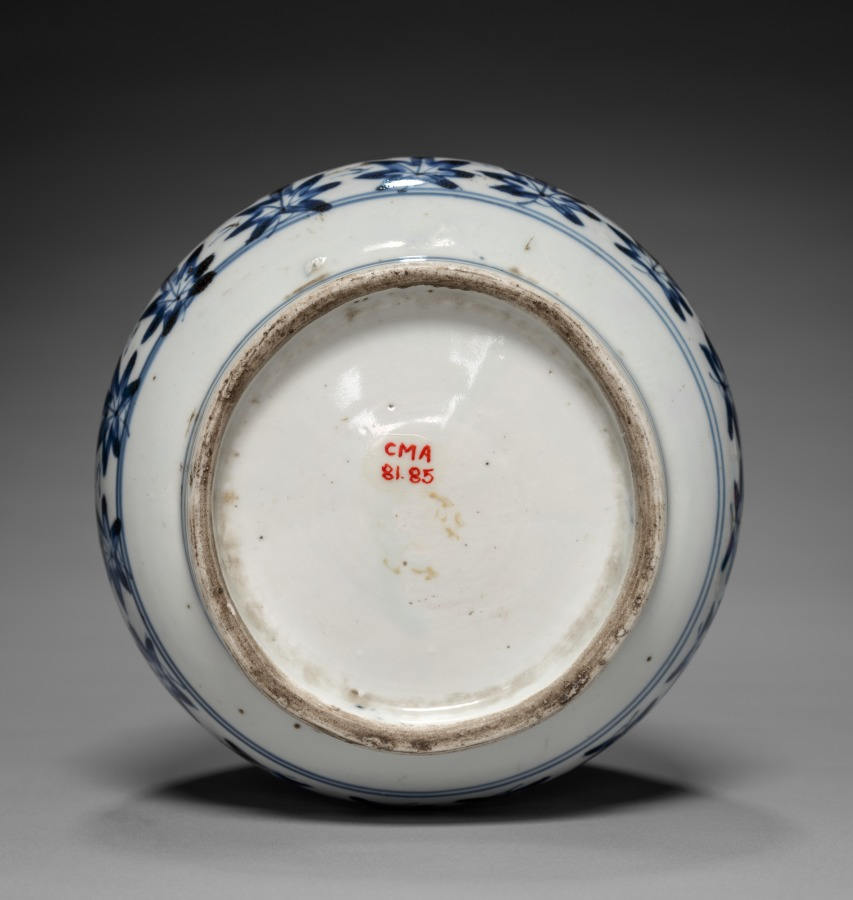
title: Bottle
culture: Japan, Edo period (1615–1868)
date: early 1600s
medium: porcelain painted in underglaze blue (Hizen ware, Arita type, Imari style)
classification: Ceramic